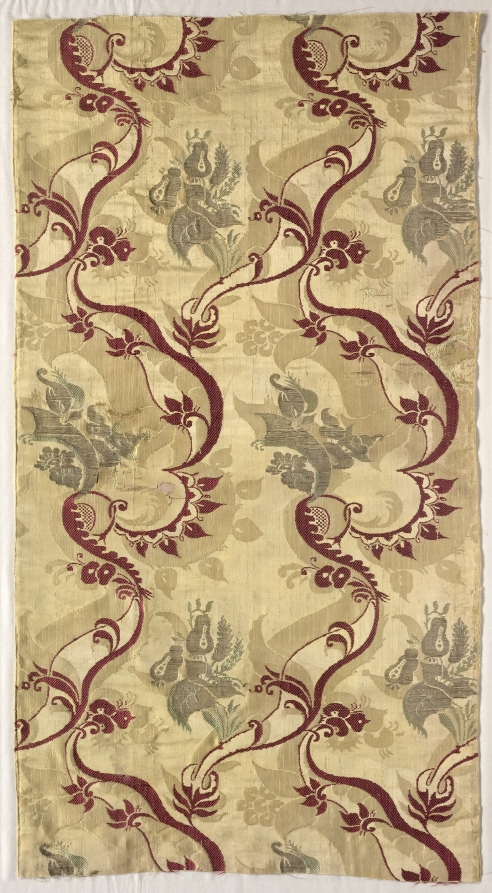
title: Length of Brocaded Silk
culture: France or Italy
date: 1700s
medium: damask, brocaded; silk and metal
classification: Textile